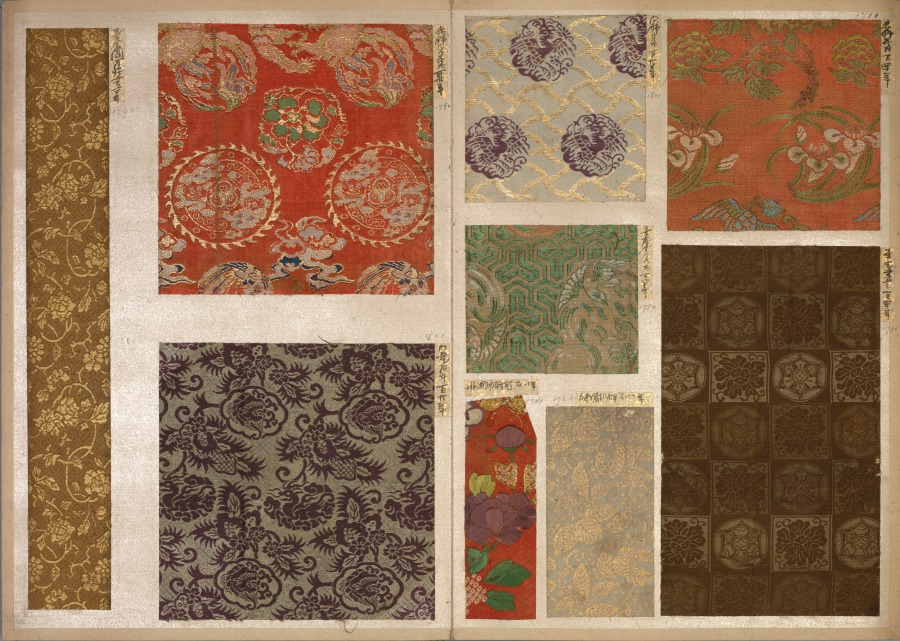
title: Album of Textile Samples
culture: Japan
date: 1790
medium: silk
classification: Textile